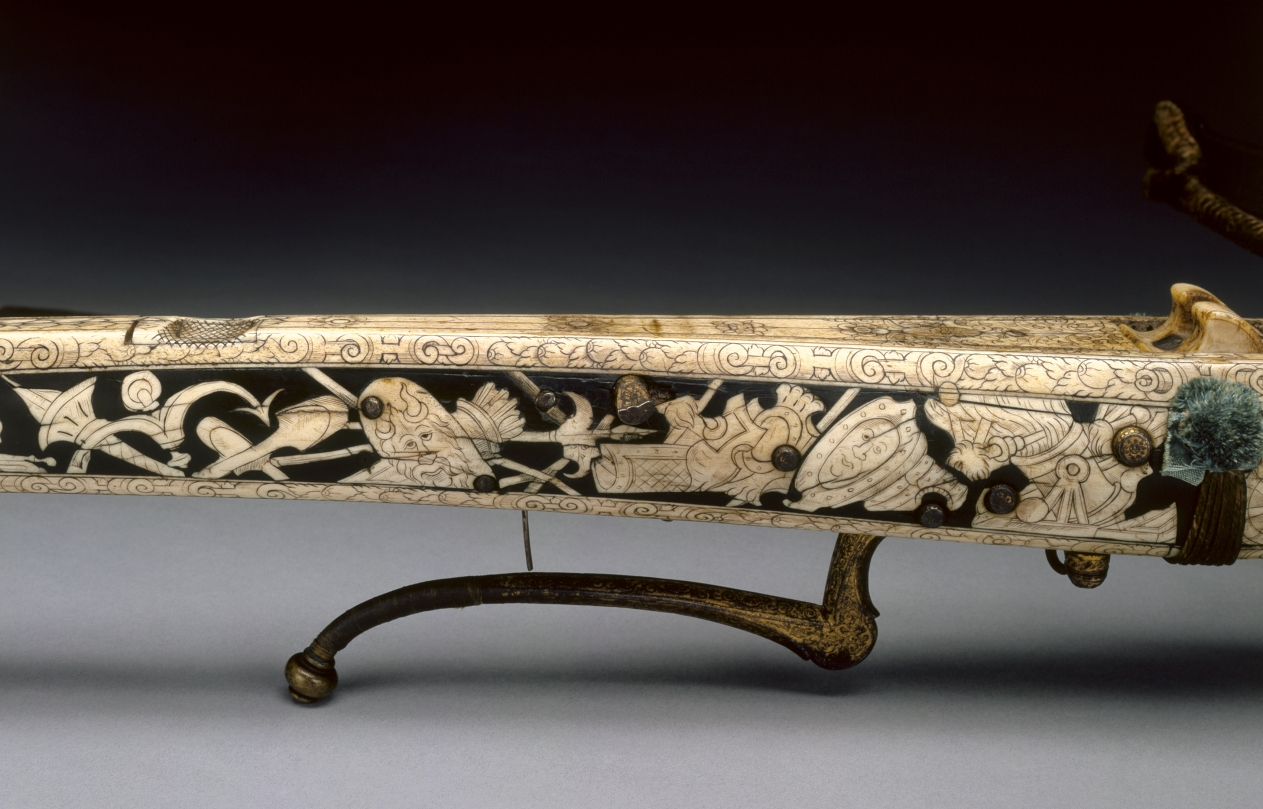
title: Crossbow of Elector Augustus I of Saxony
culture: Germany, Saxony, 16th century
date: c. 1553–73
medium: wood (walnut?), bone veneers, flax cord, steel (etched, traces of gilding). woolen pompoms, stock decorated wih inlaid trophies of arms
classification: Arms and Armor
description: This crossbow was a hunting weapon for Prince Elector Augustus I, a member of the ruling elite in the Holy Roman Empire. Augustus, powerful and wealthy, had even the most practical instruments ornately decorated, including this crossbow and its cranequin, or winding device.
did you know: Augustus was a marksman who took part in crossbow competitions. He had a large collection and often gave them to friends.